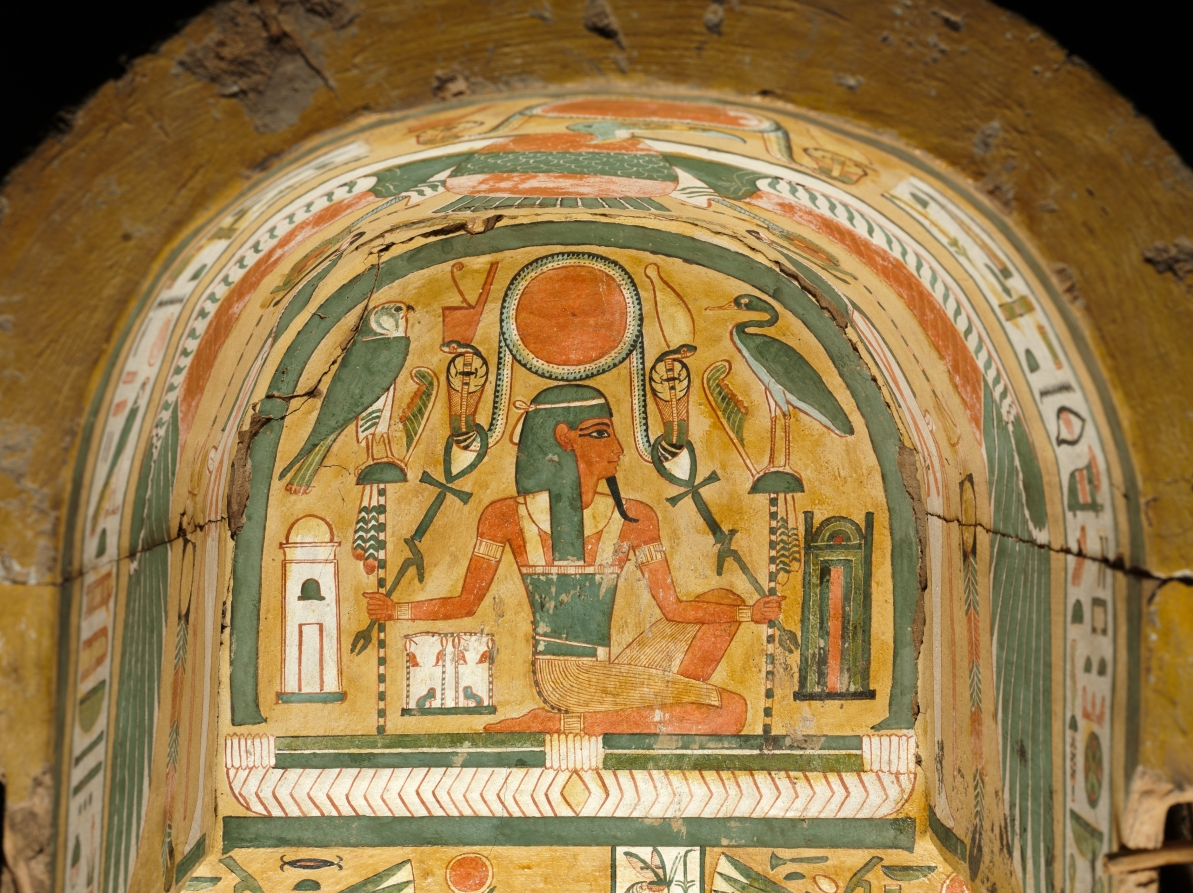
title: Coffin of Bakenmut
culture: Egypt, Thebes, Third Intermediate (1069–715 BCE), Dynasties 21–22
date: c. 1000–900 BCE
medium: gessoed and painted sycamore fig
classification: Funerary Equipment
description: The coffin of Bakenmut is one of the finest examples of painted wooden coffins made for the priests of Amen and their families at Thebes during Dynasty 21 and early Dynasty 22. The pharaohs of this time were no longer buried in the Valley of the Kings, but instead built tombs in the Delta, far to the north, where they resided. Security was lax in the Theban necropolis. The coffins and funerary goods of the wealthy citizens of Thebes were placed in unmarked and undecorated family tombs cut into the cliffs on the west bank of the Nile. All the care and detail that in more prosperous times were devoted to the decoration of the tomb chapel were now lavished on the elaborately painted coffins. Every available surface is crowded with religious scenes, images of funerary gods and goddesses, protective spells, and magical symbols. The deceased appears mummiform. An elaborate floral collar entirely covers the upper body, exposing only the separately attached hands (now lost). A pair of red "mummy braces" are crossed over the chest, their point of intersection marked by a winged sun disk. The lower body is covered with tiny figures modeled in gesso against a yellow background, which gives the effect of gold inlaid with glass or semiprecious stone. The decoration on the interior features two deified dead kings of Dynasty 18. Although these rulers had lived centuries before, memory of their greatness was still very much alive. The main scene near the top depicts Tuthmosis III, the great military pharaoh, who lived 500 years before Bakenmut. Posed as a mummy, the ruler wears a brilliant feathered garment enfolding him with falcon’s wings. The scene below features back-to-back seated images of Amenhotep I, regarded as the patron of the Theban cemetery and worshiped as a local god there.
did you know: Originally another smaller coffin was placed inside this outer coffin and in that the deceased with a mummy board would have rested.